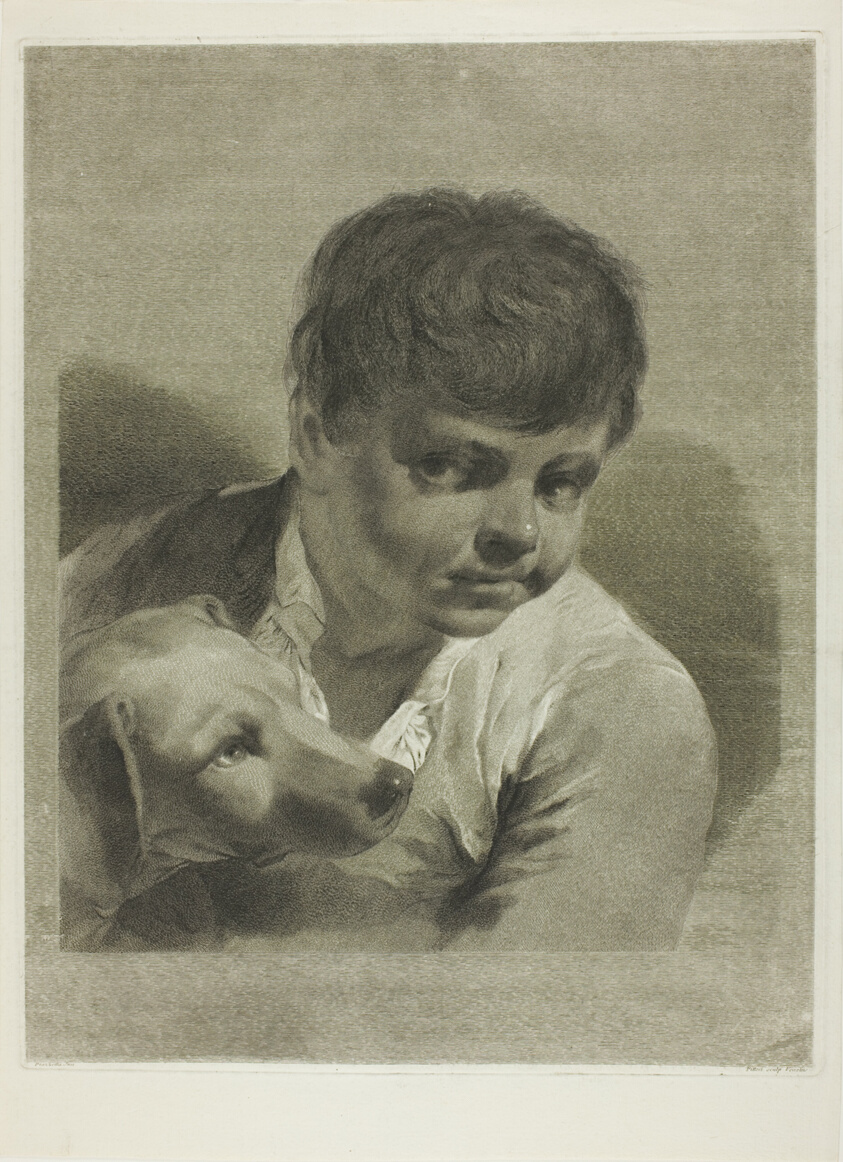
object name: Print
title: A Boy with a Dog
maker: Marco Alvise Pitteri (Italian, 1702-1786); after Giovanni Battista Piazzetta (Italian, 1682-1754)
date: 1750/59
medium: Engraving over etching on ivory laid paper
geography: Italy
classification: etching; print; prints and drawing